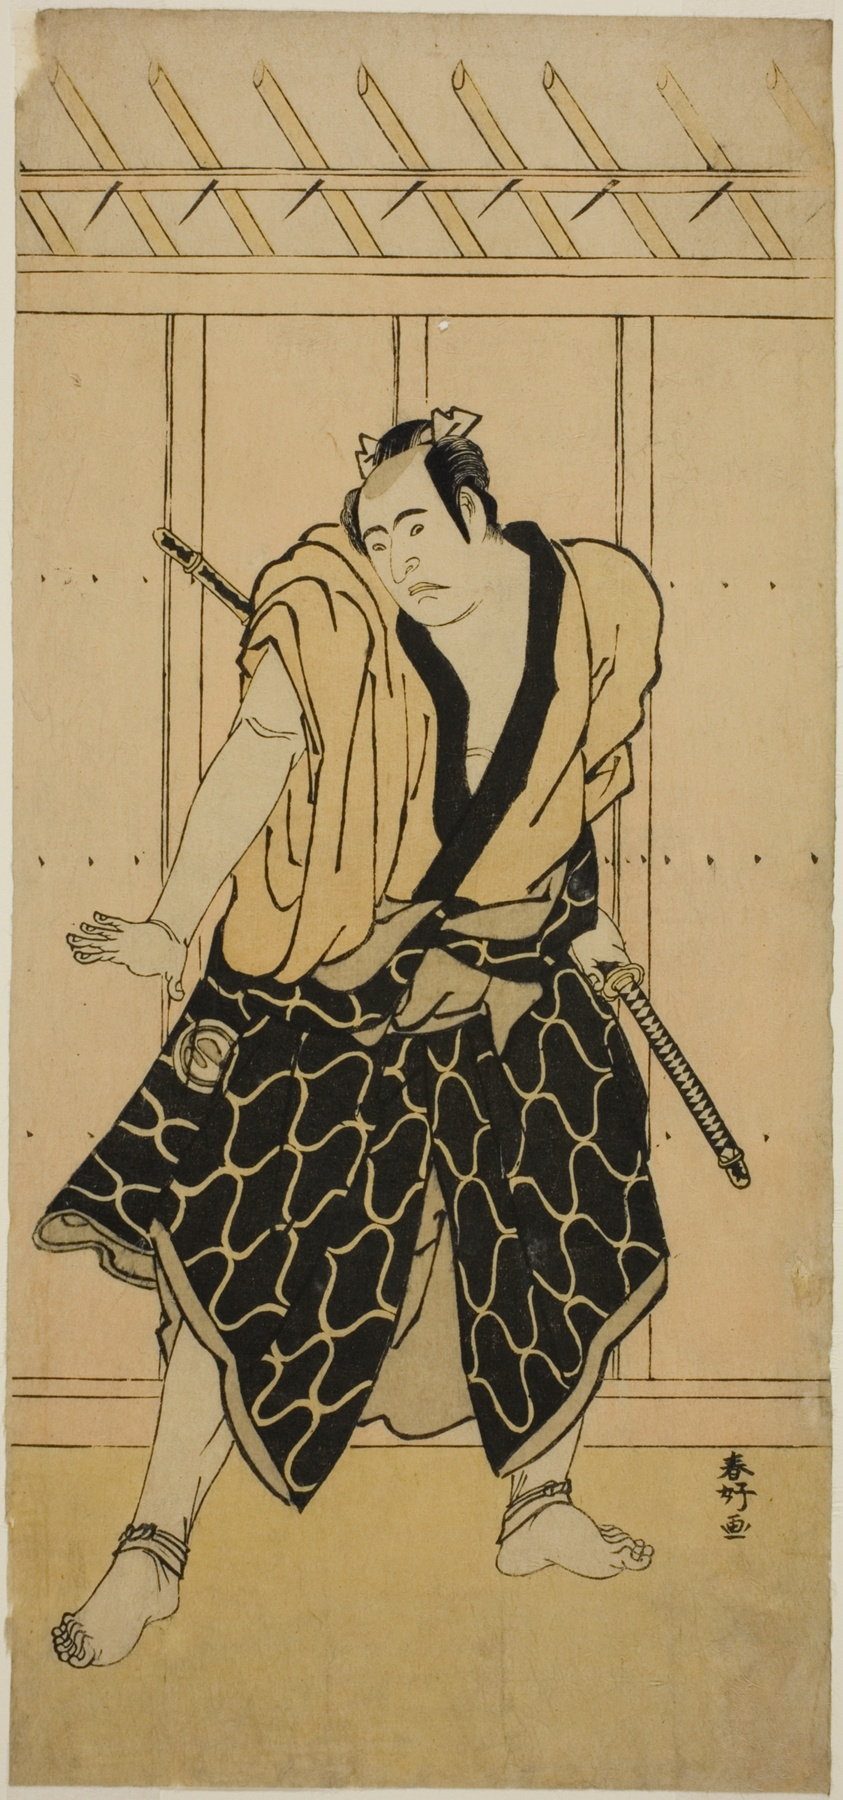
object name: Print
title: The Actor Sawamura Sojuro III as Soga no Dozaburo (?)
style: Japanese (culture or style)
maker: Katsukawa Shunko I; Japanese, 1743-1812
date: c. 1789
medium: Color woodblock print; hosoban; from a multisheet composition (?)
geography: Japan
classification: woodblock print; print; asian art